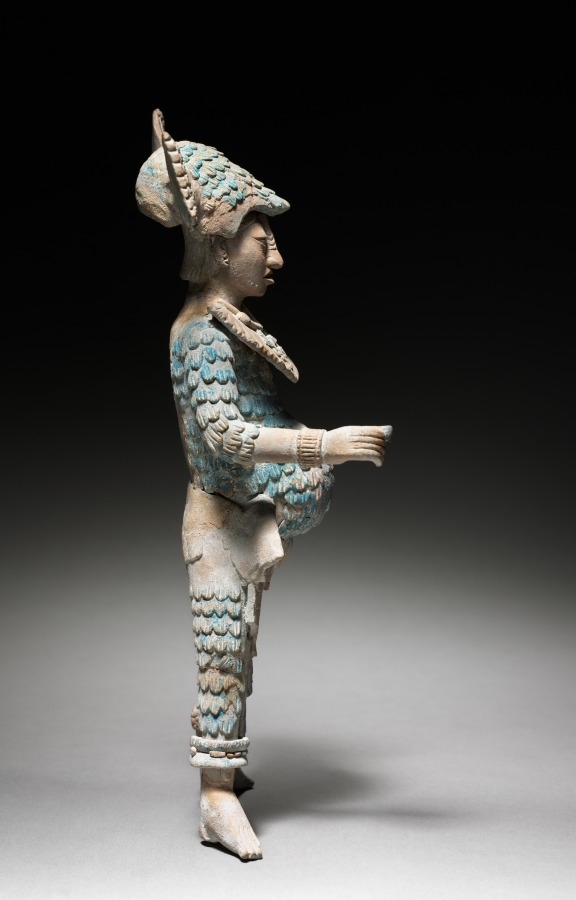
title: Warrior Figurine with Removable Headdress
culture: Mexico, Yucatán, Jaina Island region, Campeche, Maya style (250-900)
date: 600–900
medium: earthenware with pigment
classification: Sculpture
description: The major offerings placed in the Maya graves of Jaina Island were ceramic figurines, some of Mesoamerica's finest, that depict deities and humans in a variety of roles. This warrior, his headdress removable, once probably held weapons and wears either quilted cotton armor or the feathered uniform of a military order. We don't know why such figures are often pot-bellied.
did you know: Maya blue pigment was made by combining clay with indigo in a complex technique developed around the ninth century.